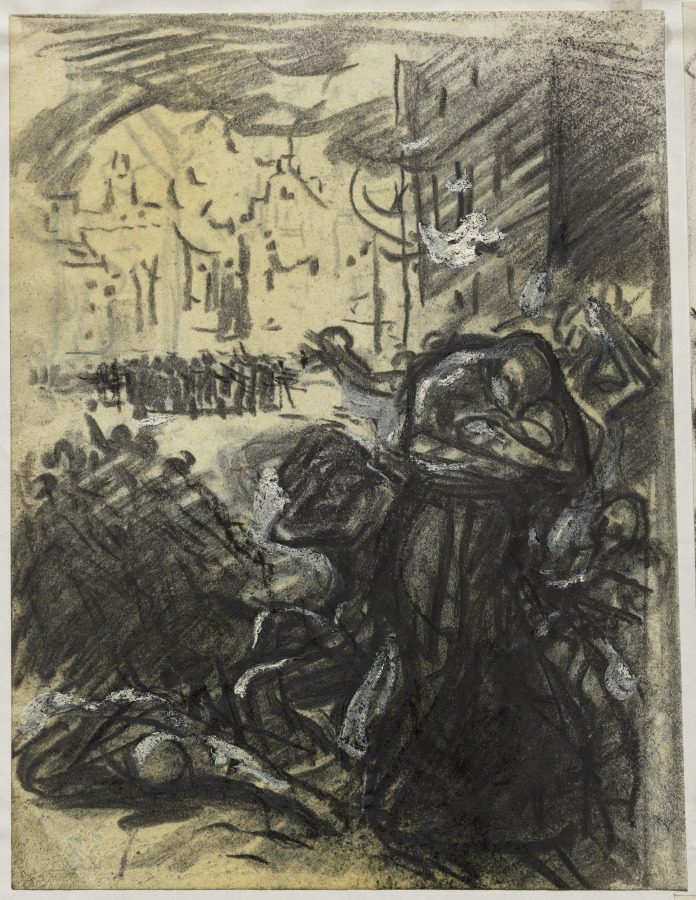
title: L'Incendie de Louvain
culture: France, 20th century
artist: Auguste Louis Lepère (French, 1849–1918)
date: 1914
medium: pen and brush and black ink with white highlights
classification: Drawing